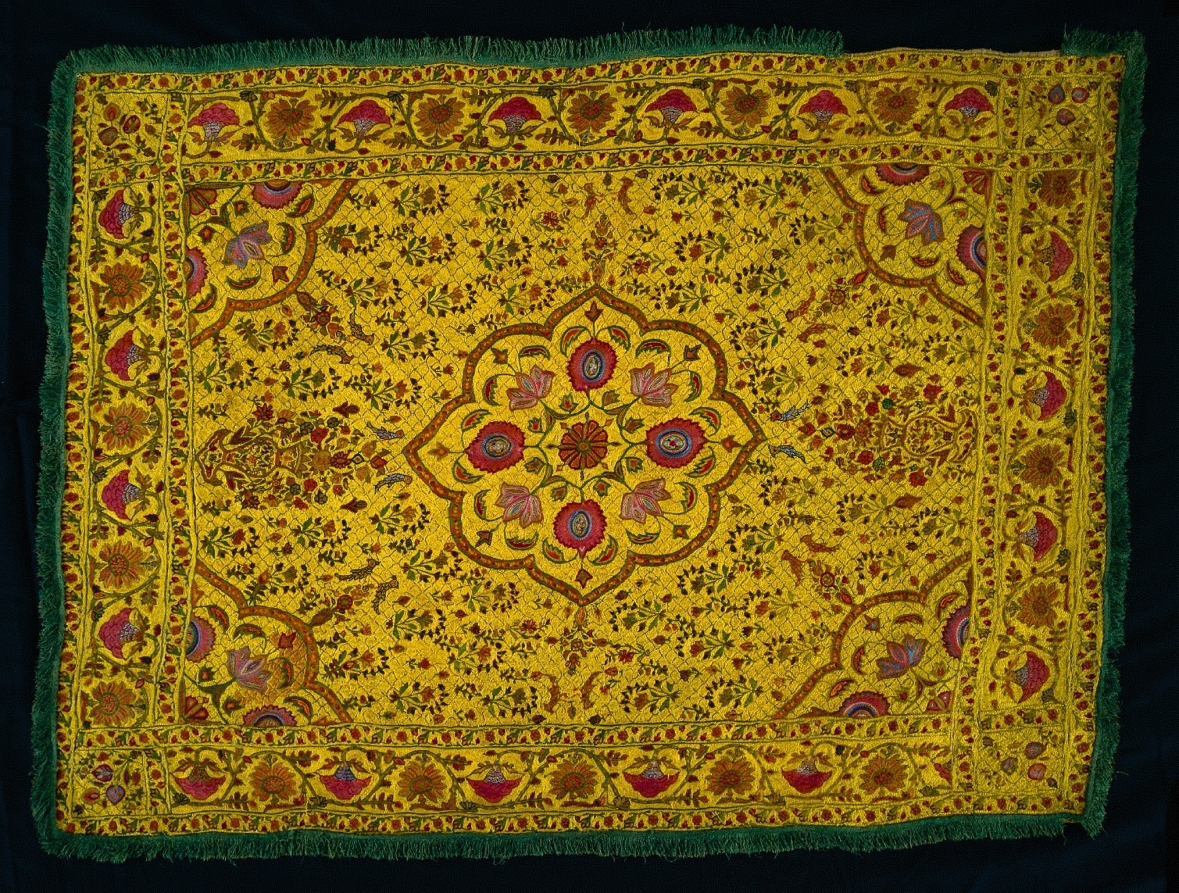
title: Embroidered Panel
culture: India, 18th-19th century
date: 18th-19th century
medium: embroidery; silk and metallic threads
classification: Embroidery